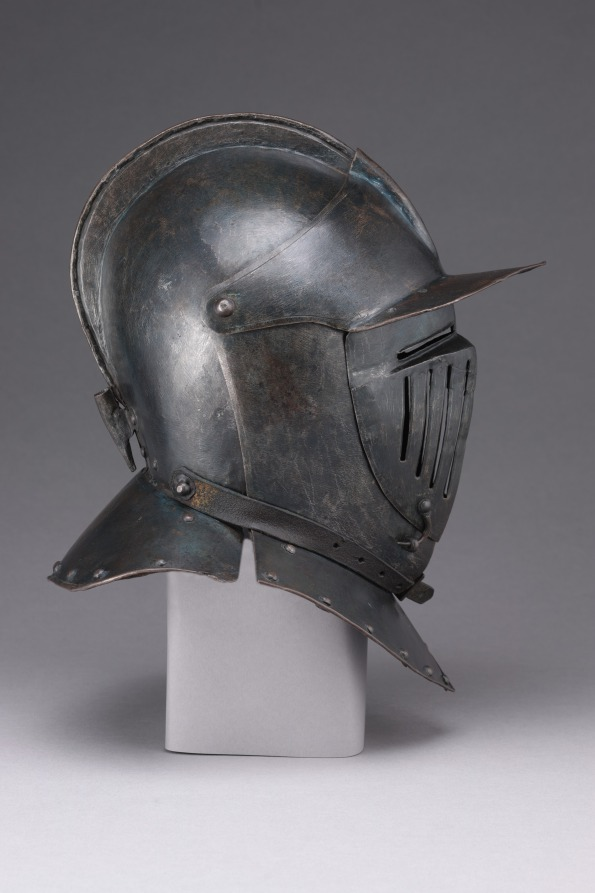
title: Cuirassier's Armor: Helmet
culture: Austria, Graz(?), early 17th century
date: c. 1600–20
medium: steel (originally blued, now black); leather straps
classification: Arms and Armor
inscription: Proof mark (musket shot) is located on the proper left side of the breastplate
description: The cuirassier was the heavy cavalryman of the late 1500s and early 1600s. Carrying pistols and a sword, he was clad in full armor, with the exception of his lower legs, which were protected by heavy riding boots. Shortly after 1650, such heavy cavalry armor disappeared from use. By then, European cavalries had abandoned full armor as impractical against the increased sophistication of firearms.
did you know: When assembled, this suit of armor is just over 5-1/2 feet tall.